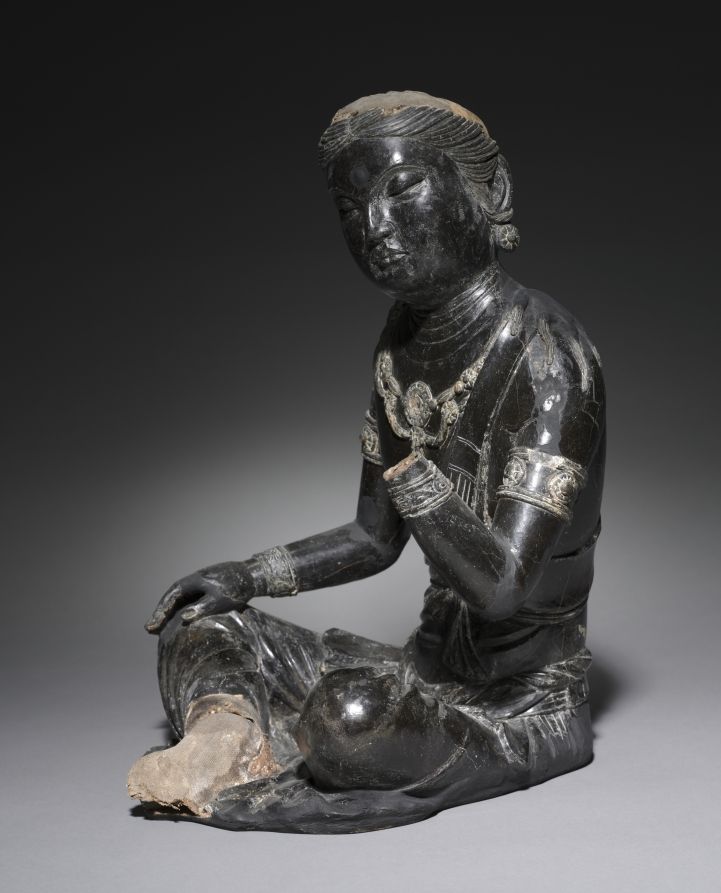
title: Bodhisattva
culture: China, Tang dynasty (618-907)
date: 700s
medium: dry lacquer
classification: Sculpture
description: The bodhisattva, an enlightened being dedicated to the spiritual awakening of all beings, is shown sitting in a relaxed pose, the eyes half-closed in an expression of profound meditation. The statue is modeled in a sensuous manner. It is made using the dry lacquer technique whereby a clay core is first constructed and then overlaid with fabrics saturated with lacquer. Once the lacquer layers are set, the core is removed. This kind of hollow dry lacquer statue is lightweight and easy to carry. The piece once suffered from severe surface retouching that distorted its original beauty. The museum's conservation work has removed coats of overpainting and over-restoration, revealing the true appearance of the glossy black lacquered surface with traces of cut-gold decoration and pigments.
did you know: While lacquer is tough and impervious to insects, it is less durable than wooden or stone sculptures, so this is a rare surviving Tang example.